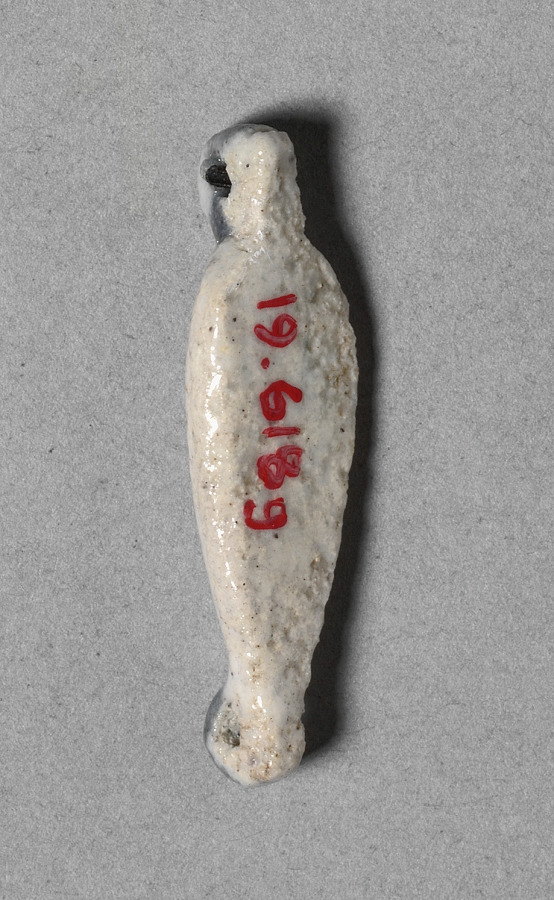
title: Petal-Shaped Bead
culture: Egypt, New Kingdom (1540–1069 BCE), Dynasty 18, reign of Amenhotep III (1390–1352 BCE)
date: c. 1391–1353 BCE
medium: faience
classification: Jewelry